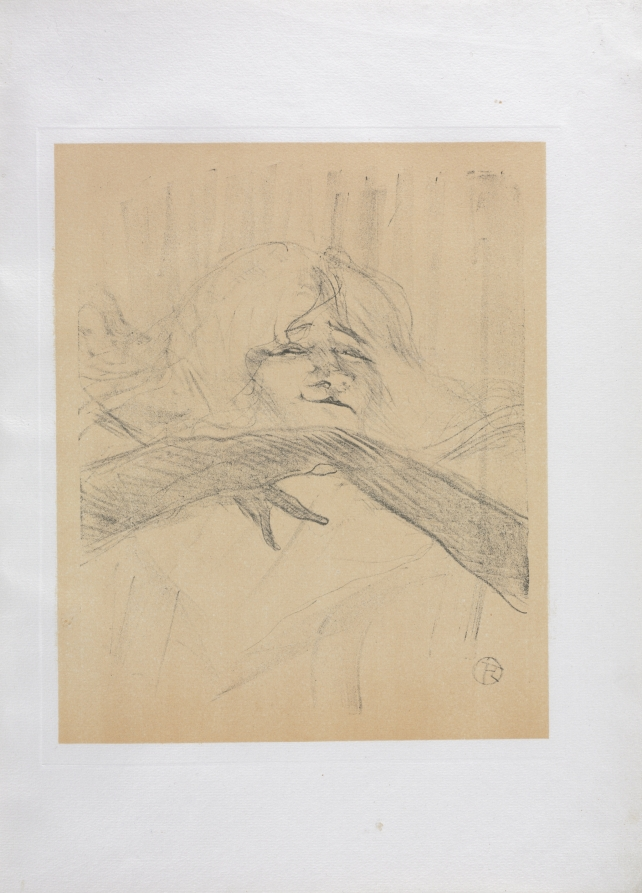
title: Yvette Guilbert-English Series: Linger Longer Loo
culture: France, 19th century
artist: Henri de Toulouse-Lautrec (French, 1864–1901)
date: 1898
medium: lithograph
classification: Bound Volume